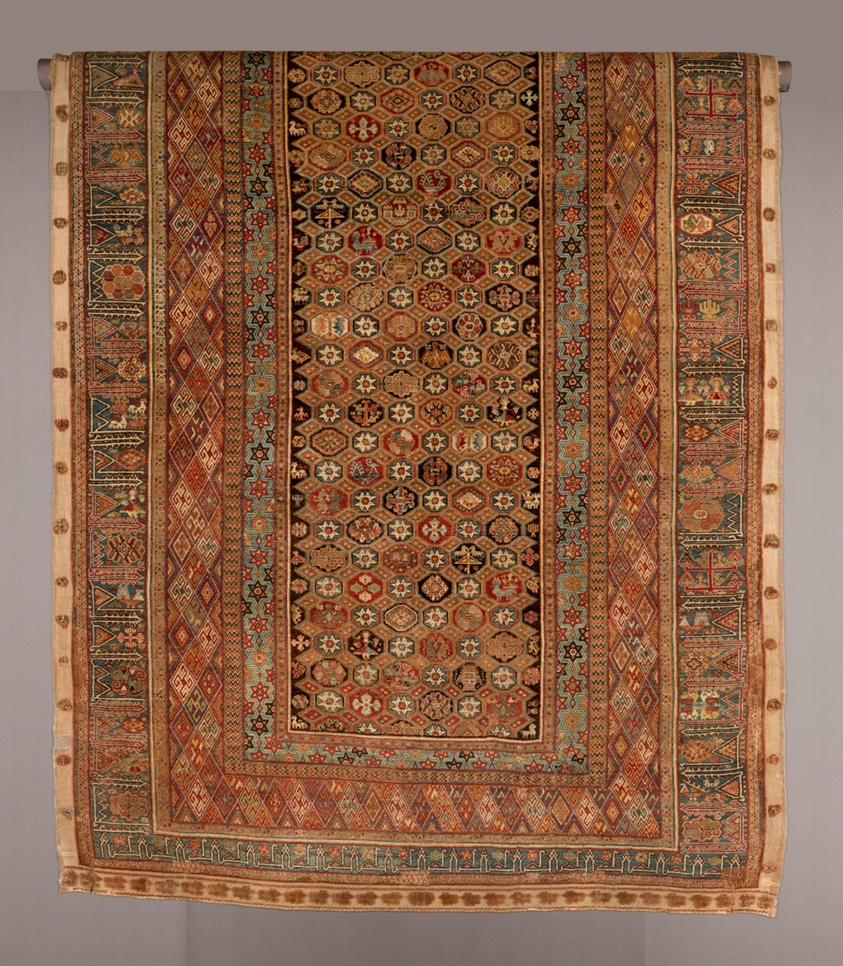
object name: Textile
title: Carpet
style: medieval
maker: Spain; probably Murcia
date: 1450/1500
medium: Wool, Spanish knots on plain weave ground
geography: Spain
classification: textile; weaving - carpet